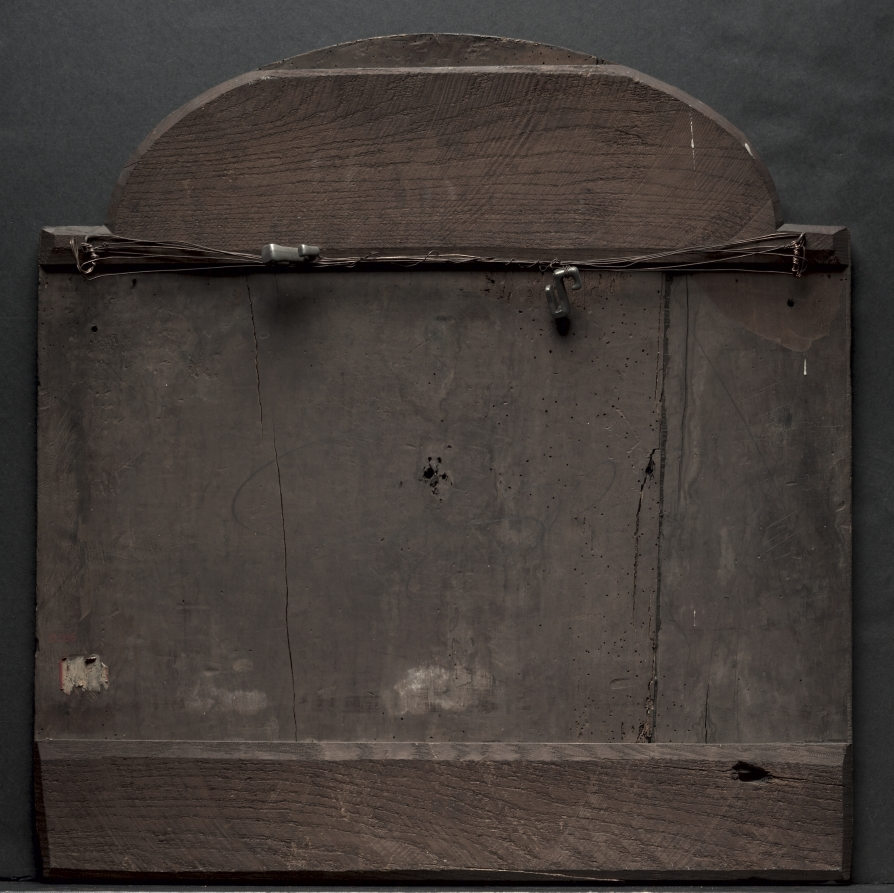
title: Carved Wood Panel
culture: France, 18th century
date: 1700s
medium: wood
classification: Furniture and woodwork